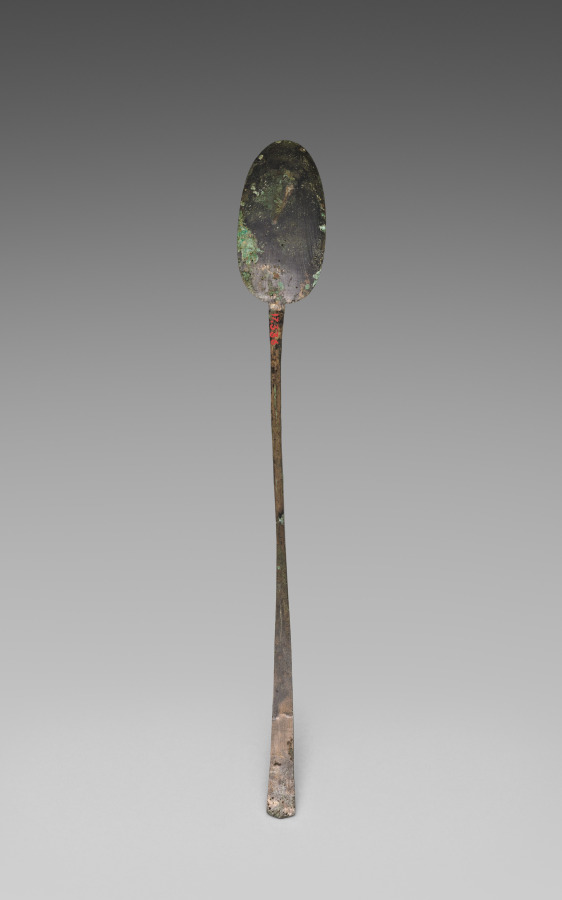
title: Spoon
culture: Korea, Goryeo dynasty (918–1392)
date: 918–1392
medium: silver bronze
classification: Metalwork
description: Celadons, spoons, seals, and bronze mirrors were the most common burial objects in tombs during the Goryeo period (918–1392). Furnishing tombs with an elaborate assemblage of objects was believed to honor and comfort the newly dead. Generally, Goryeo tombs were left untouched until the late 19th century. During the colonial period (1910–45), however, Japanese archaeologists hastily excavated the tombs located in Kaeseong, the former capital of the Goryeo period. Scholars recently have proposed that toward the end of the 14th century, Koreans enjoyed meat-based soups more than any other dishes, explaining why many more spoons than chopsticks were buried in tombs.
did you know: Bronze spoons are the most common burial item. Scholars have proposed that toward the end of the 14th century, Koreans enjoyed meat-based soups more than any other dishes, explaining why spoons became common household items as well as burial goods.